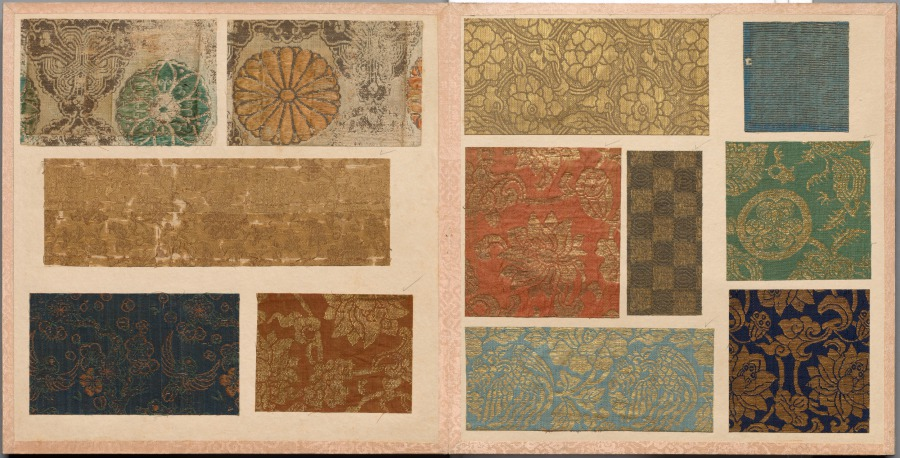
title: Album of Textile Samples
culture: Japan and China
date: 1700s–1800s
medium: silk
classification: Textile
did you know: This album has 26 pages containing 128 mounted Chinese or Japanese textile samples.